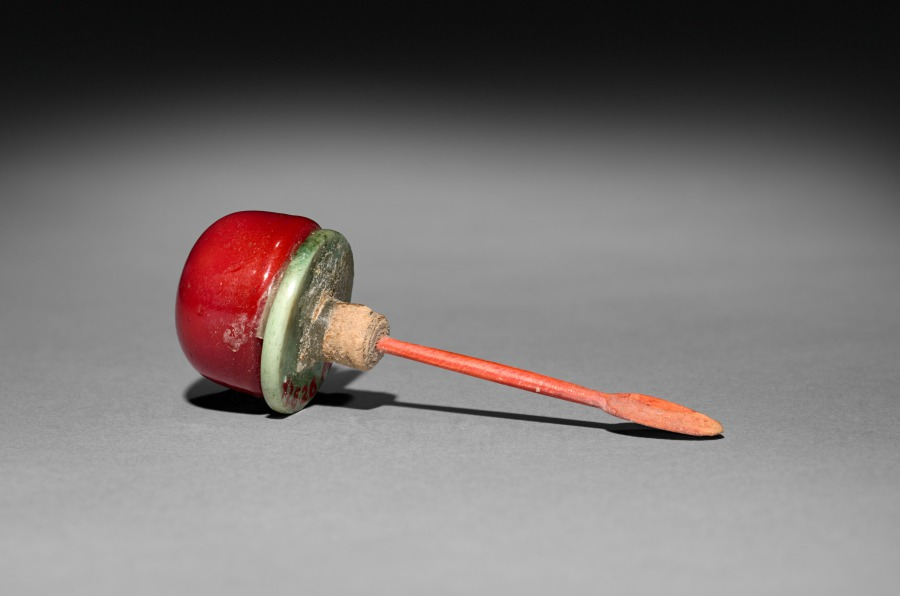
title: Snuff Bottle with Stopper (stopper)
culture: China, Qing dynasty (1644–1911), Qianlong reign (1736–95)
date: 1736–95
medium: crystal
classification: Stone